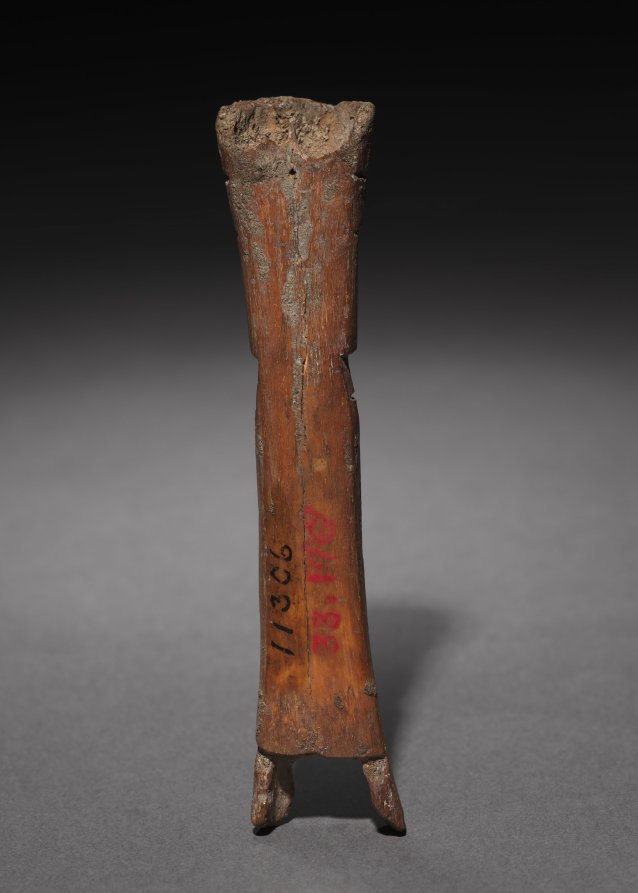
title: Amulet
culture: Parthian Empire (247 BCE–224 CE)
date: 1–200 CE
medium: carved bone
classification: Miscellaneous